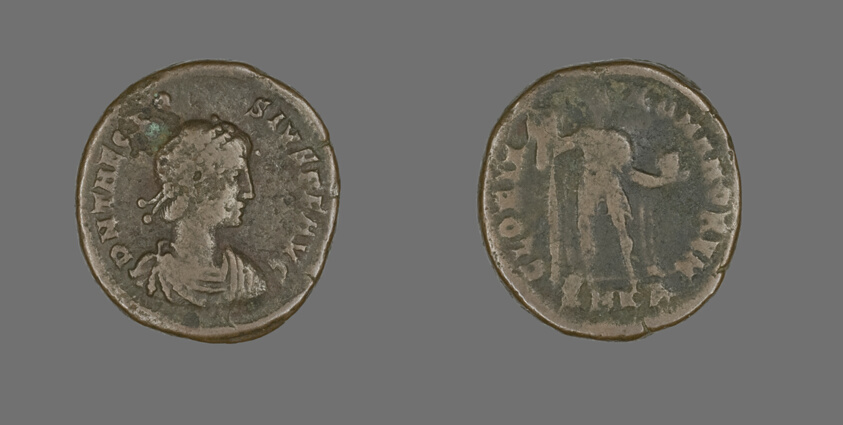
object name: Coin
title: Coin Portraying Emperor Theodosius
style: roman (ancient, style or period), ancient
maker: Roman, minted in Cyzicus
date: 379-395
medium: Bronze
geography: Roman Empire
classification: coin; ancient art